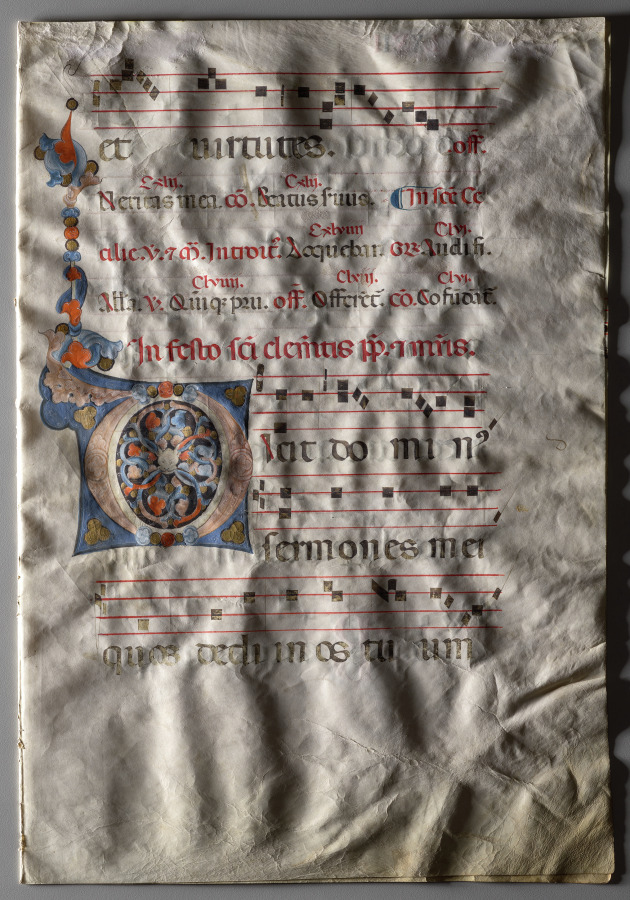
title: Bifolio from a Gradual: Initial (G) with Christ, the Virgin, and Apostles and Initial (O) (recto)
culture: Italy, Siena(?)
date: c. 1300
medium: Ink, tempera, and gold on vellum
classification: Manuscript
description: The large decorated initial G introduces the text, Gaudeamus omnes in Domino (Let us rejoice in the Lord). It is the beginning of the opening prayer, or introit, of the Mass for the Feast of All Saints (November 1). The figures within the initial include Christ, the Virgin Mary, and various saints.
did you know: Words written in red ink, called rubrics, indicate titles and chapter headings that are not part of a manuscript’s main text.